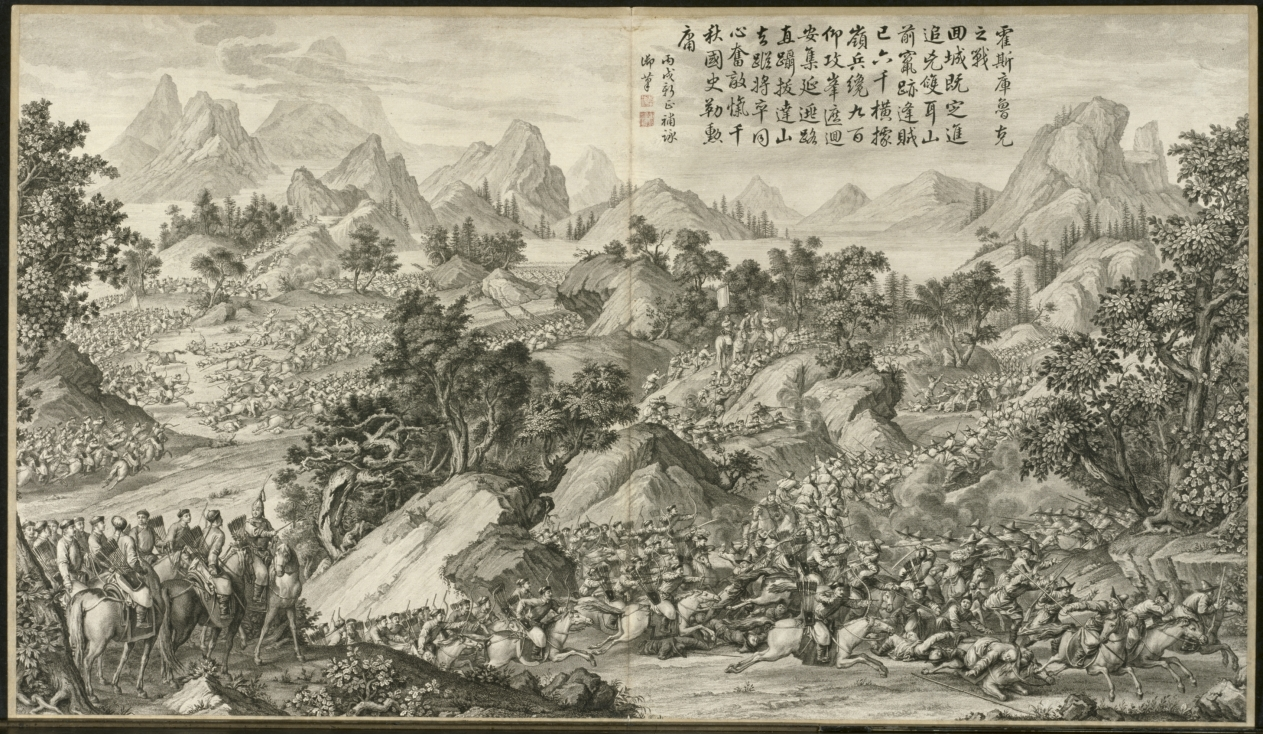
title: Battle at Heshi Kuluke: from Battle Scenes of the Quelling of Rebellions in the Western Regions, with Imperial Poems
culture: China, Qing dynasty (1644–1911), Qianlong reign (1736–95)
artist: Jean Damascene Sallusti (Italian, d. 1781)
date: c. 1765–74; poem dated 1766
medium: etching, mounted in album form, 16 leaves plus two additional leaves of inscriptions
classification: Print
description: This set of etchings was commissioned by Emperor Qianlong to record in pictorial terms the courage of his generals and soldiers in quelling the rebellions in the Western Regions. Qianlong added his own poem to each of the etchings, indicating his appreciation and pride in this demonstration of military might. "Western Regions" refers to the present-day Xingjiang province, often described in Western writing as "Central Asia."